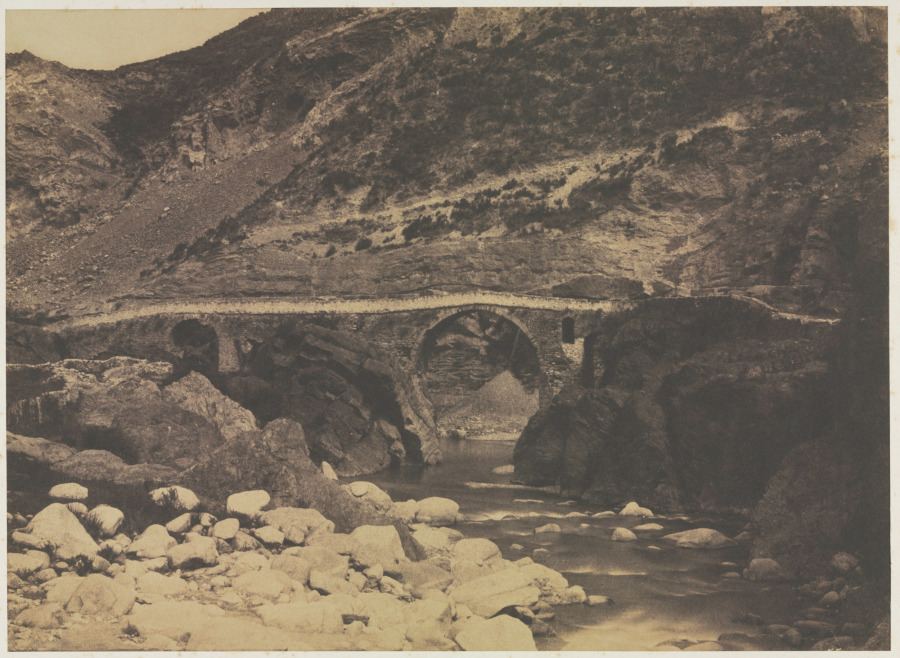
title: The Bridge of Palalda (near Amelieles-Bains)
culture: France, 19th century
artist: Gustave Le Gray (French, 1820–1884)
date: 1851–1852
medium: salted paper print from waxed paper negative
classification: Photograph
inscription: Written in pencil on recto of mount: "Gustave LeGray c. 1851"; in pencil on verso: "Le Gray"; "g [in center of a triangle - monogram ?]"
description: In 1851, Gustave Le Gray and his friend, photographer Auguste Mestral, traveled throughout southwestern France for the Commission of Historic French Monuments to document sites of historical importance, especially those in urgent need of, or undergoing, restoration. This image was taken from the left bank of the Tech River, situated below the old town of Palalda, four miles from the Spanish border. Le Gray stressed the rugged landscape over a close-up rendering of the ancient bridge, which was not on his list of assigned sites. The sheer cliff seems to blend into the structure, resulting in visual uncertainty and spatial tension.